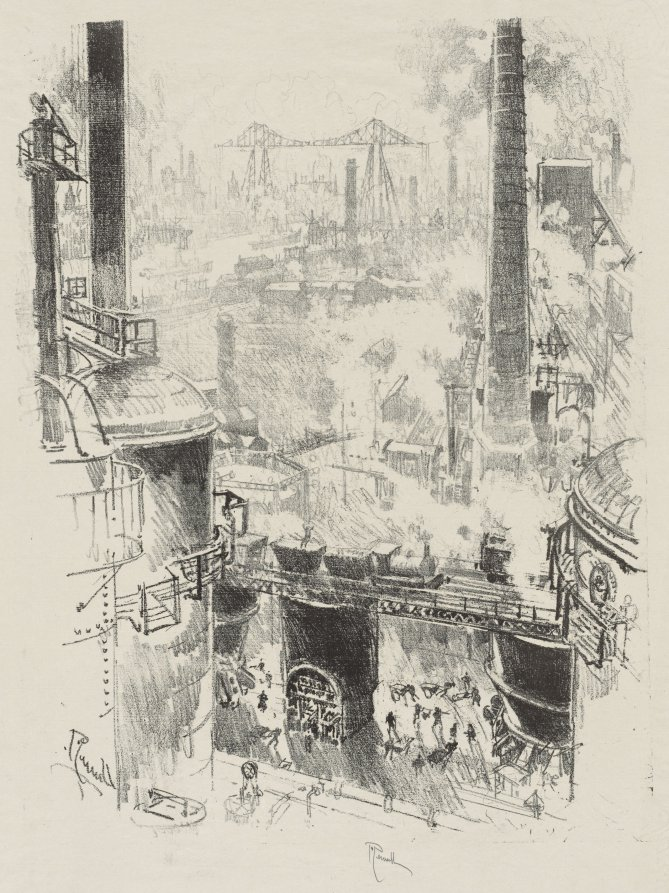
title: English War Work: From othe Tops of the Furnaces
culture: America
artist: Joseph Pennell (American, 1857–1926)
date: 1916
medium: lithograph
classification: Print